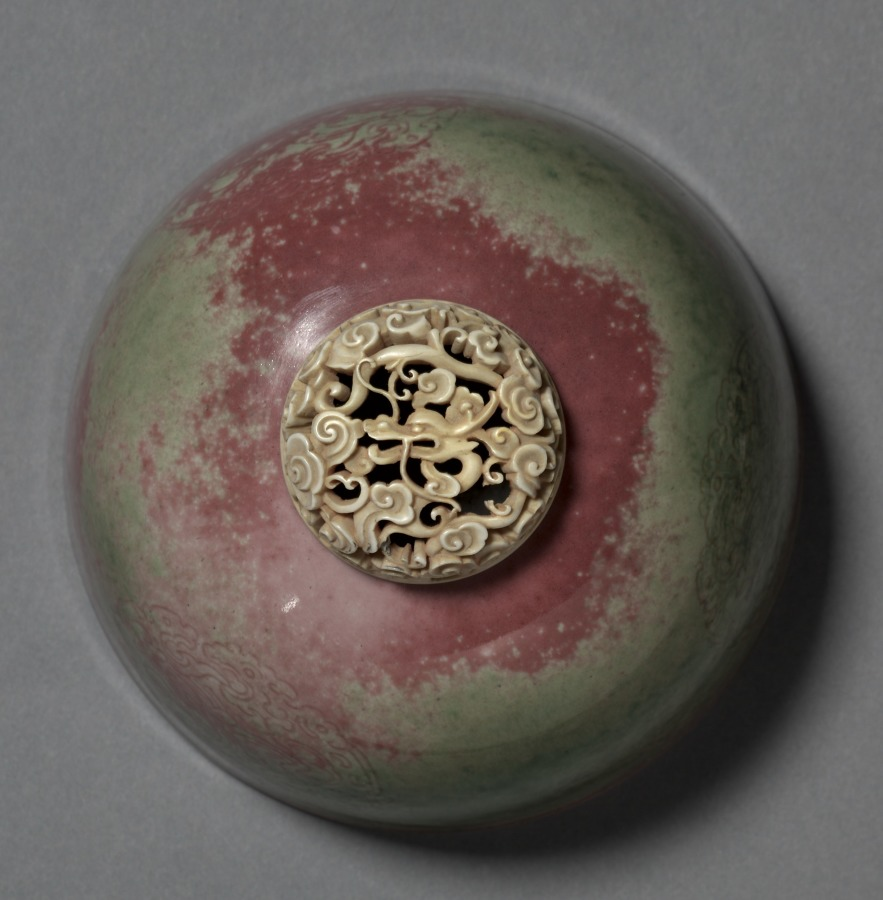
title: Water Pot with Ivory Lid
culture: China, Jiangxi province, Jingdezhen, Qing dynasty (1644-1911), Kangxi period (1662-1722)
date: 1662–1722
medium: porcelain with peach bloom glaze; ivory lid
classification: Ceramic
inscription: 大清康熙年制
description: The "peach-bloom" glaze developed during the Kangxi era has been described as "drunken with beauty." The water pot's glaze is in shades ranging from red to grayish rose. The interior and base are covered in white glaze.